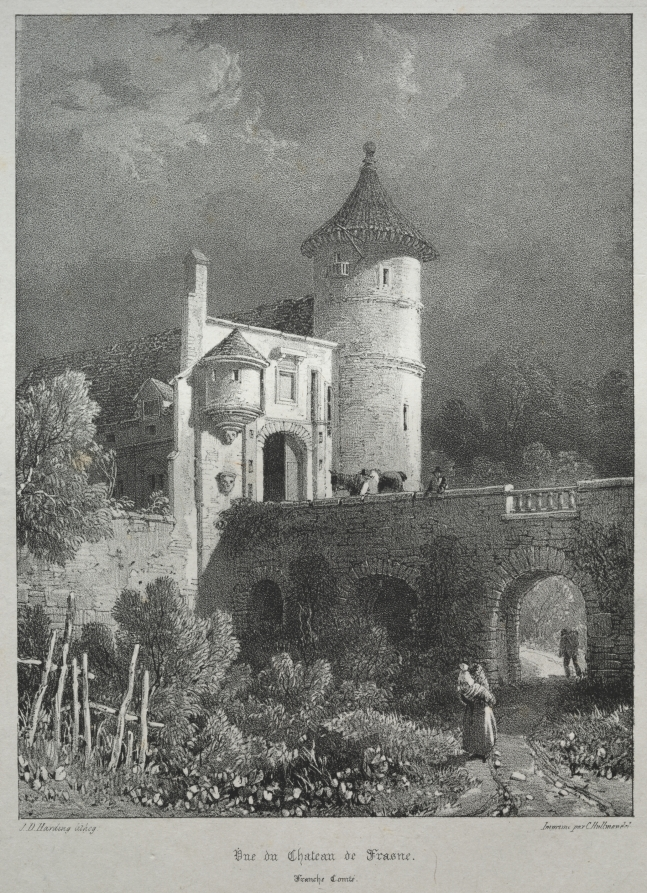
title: Voyages pittoresques et romantiques dans l'ancienne France. Franche-Comté: Vue du Château de Frasne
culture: England, 19th century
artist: James Duffield Harding (British, 1798–1863)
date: 1825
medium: lithograph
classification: Print